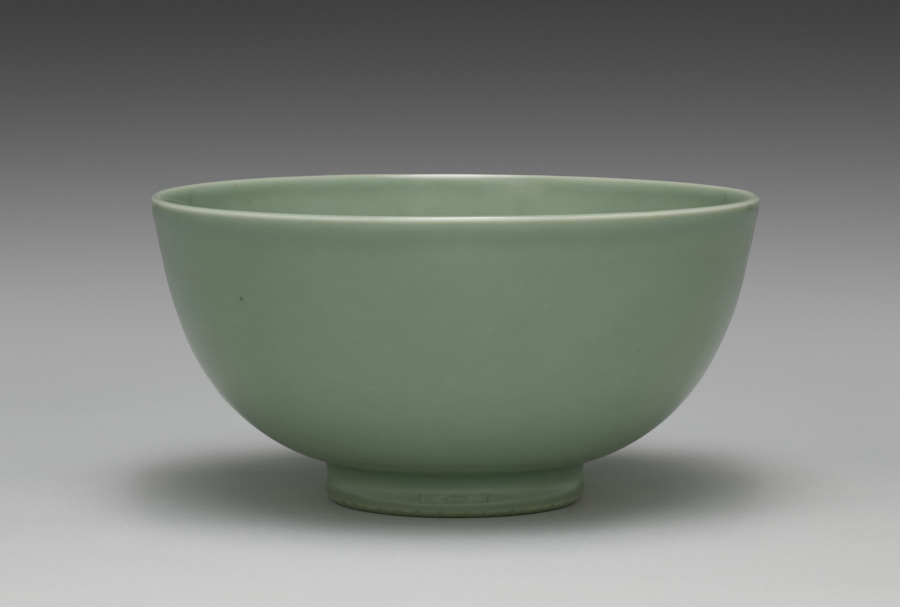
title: Sweets Bowl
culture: Japan, Meiji period (1868–1912)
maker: Seifū Yohei III (Japanese, 1851–1914)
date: 1893–1914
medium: Porcelain with green glaze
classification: Ceramic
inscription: 彫銘：清風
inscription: 共箱の箱書：（蓋裏）秘色窯菓子鉢 三世清風晟山作（印：帝室技藝員）襲（袭）四世清風與平識之（印：清風）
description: The box for this sweets bowl has an attestation by Yohei IV that it is a work by Yohei III and in the hisokuyō (C. mise yao), or “mysterious color ware,” style. In fact, as actual examples of mise ware were unknown in Yohei III’s time, he would have associated the color with the green-glazed ceramics of kilns at Longquan, also in Zhejiang Province, produced during the Yuan dynasty.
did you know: Many ceramics created by the Seifū Studio refer to and emulate Chinese ceramics in form and glazing.